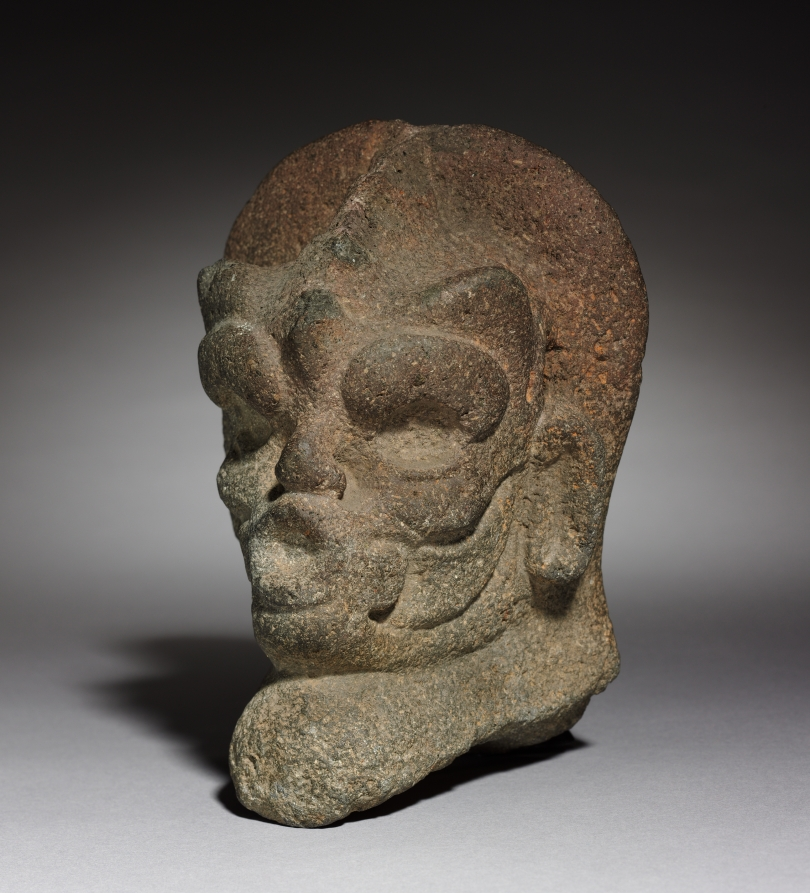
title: Head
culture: Mexico, Classic Veracruz (Totonac or Tajin)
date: 600–1100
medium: stone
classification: Sculpture